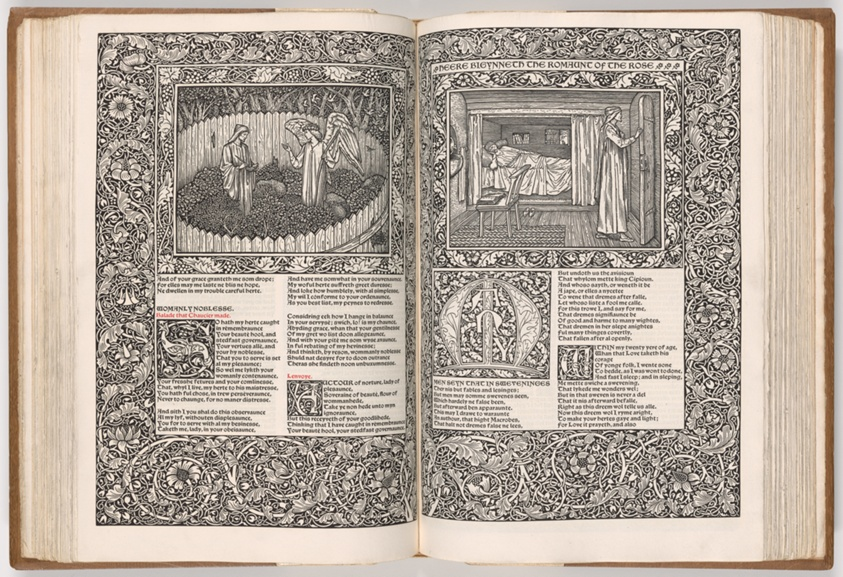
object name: Book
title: The Works of Geoffrey Chaucer Now Newly Imprinted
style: Arts and Crafts Movement, 19th century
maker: William Morris (English, 1834–1896); Illustrated by Sir Edward Burne-Jones (English, 1833-1898); Engraved by William Harcourt Hooper (English, 1834-1912)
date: 1896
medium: Hand-printed book on Batchelor linen paper, bound with tooled white pigskin on oak board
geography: England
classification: book; ink on paper